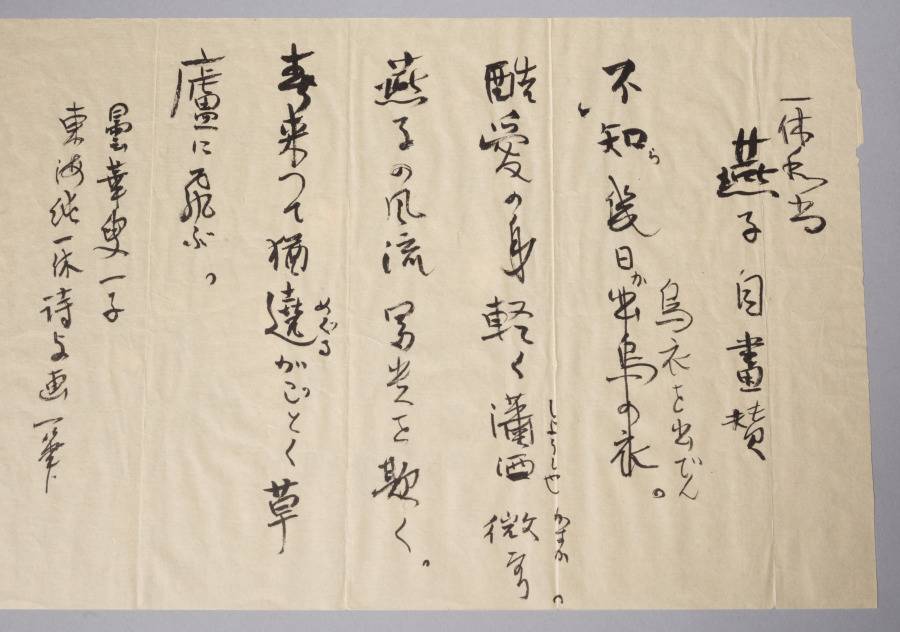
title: Calligraphy with Willow and Swallows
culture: Japan, Muromachi period (1392–1573)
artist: Ikkyū Sōjun (Japanese, 1394–1481)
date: 1400s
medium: hanging scroll, ink on paper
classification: Painting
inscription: How many days has it rid itself of the crow’s cloth? It knows not!/ Lovely is its body so nimble and neat./ Neither men of wealth, courtly position, or power can come close to the unfettered, noble swallow!/ With the coming of spring, it seems to be flying about, dancing around the grass hut of the foolish Priest. signed: Unkasō Isshi Tōkai jun Ikkyū shi ga ippitsu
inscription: outer box inscribed: Ikkyū Ōshō Enshi-zu Jigasan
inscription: inner box side lid inscribed: Showa 50 (1975), November by Tayama Honan with kao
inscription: Inner box side lid inscribed: Ikkyū Ōshō Bokuseki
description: The famed Buddhist monk Ikkyū is best remembered for his calligraphy. Calligraphic conventions of his time called for brushwork that did not vary much in style from character to character. However, as Ikkyū’s lines progress, his brushwork wanders between standard script and a sort of shorthand, marked by an uneven distribution of ink and a reduction of the characters to only the most necessary strokes. Ikkyū’s direct communication of emotion via brushwork became characteristic of the works produced by monks affiliated with the temple Daitokuji later in the Edo period (1615–1868).